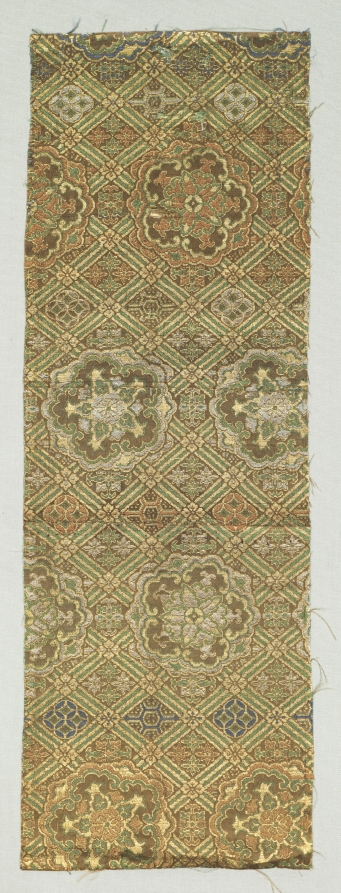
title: Fragment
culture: Japan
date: 1800s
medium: silk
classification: Textile